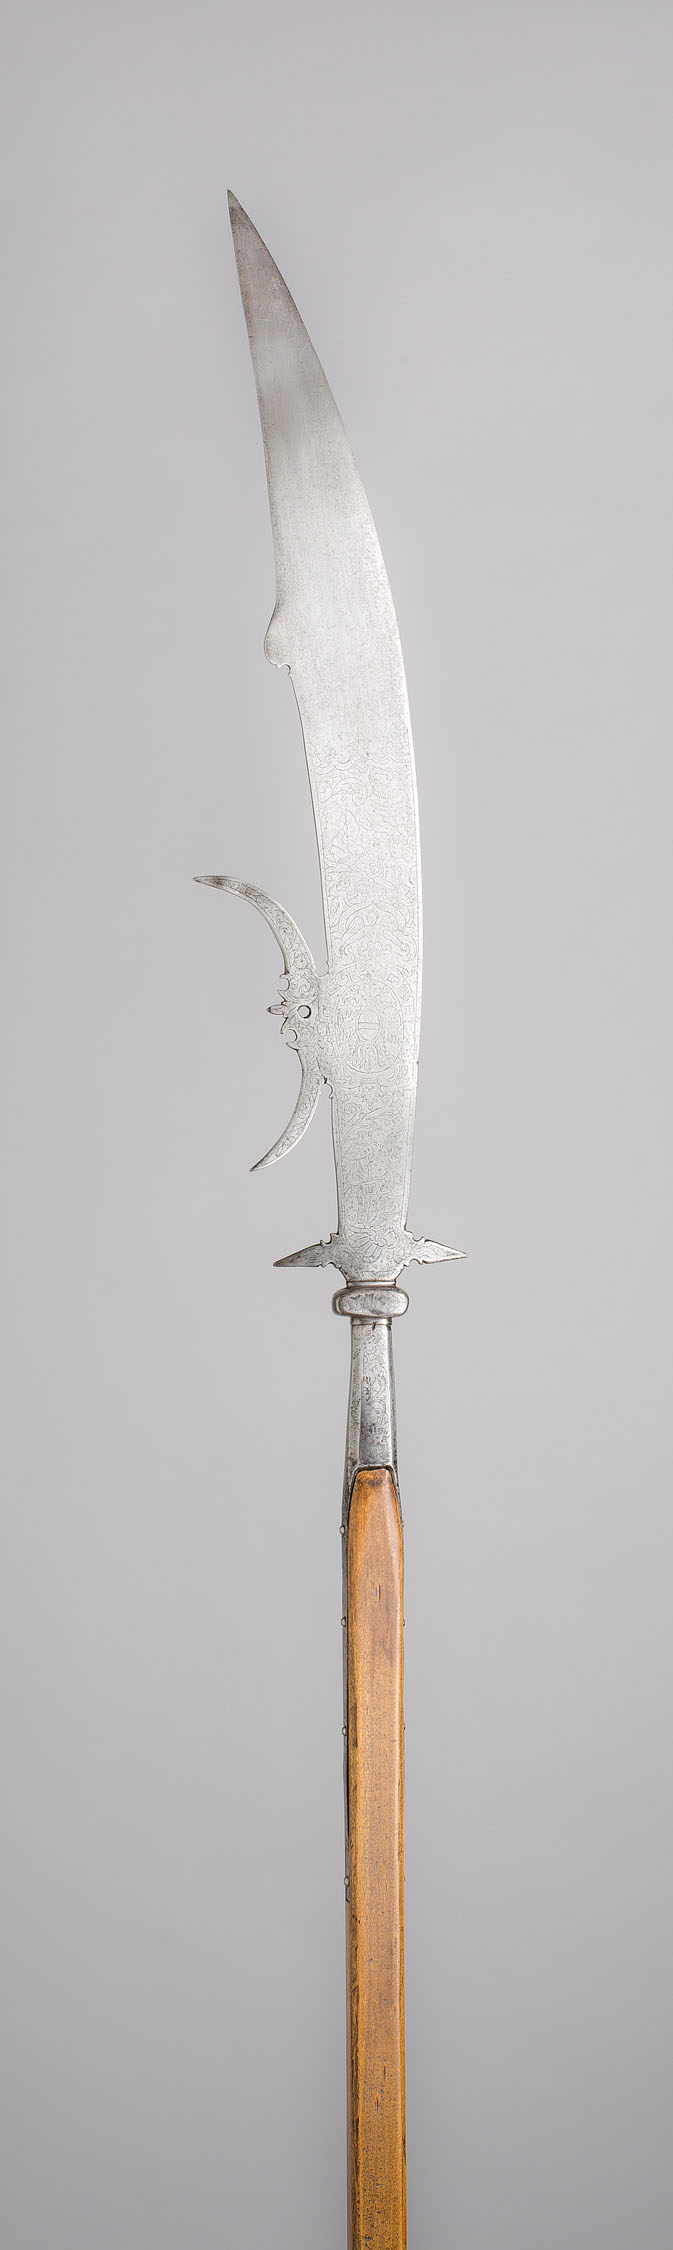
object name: Arms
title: Glaive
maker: Italian, possibly Brescia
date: c. 1600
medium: Steel and wood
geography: Brescia province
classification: edged weapon-staff; arms; arms and armor